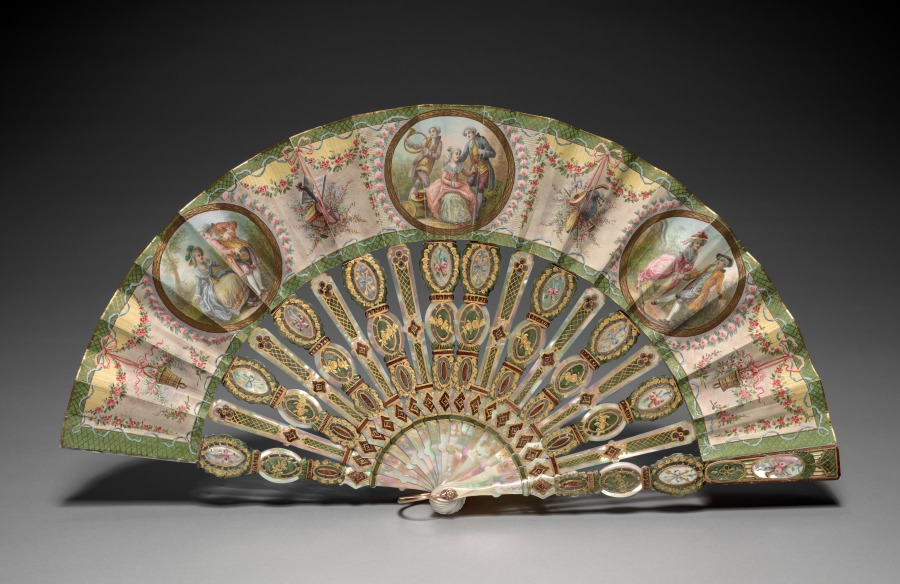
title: Fan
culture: France, late 19th century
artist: Marie Gallois (French)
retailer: Tiffany & Co. (America, New York, est. 1837)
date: c. 1850–1870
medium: Leaf: gouache on paper; sticks and guards: mother-of-pearl; pivot: gold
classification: Miscellaneous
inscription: central medallion signed: "Gallois."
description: This folding fan decorated with figures in 18th-century costume dancing, playing music, and flirting exemplifies the Rococo revival in America. In response to widespread urbanization and the spread of manufacturing, wealthy members of American society embraced styles and subjects of the past such as the fête champêtre (outdoor entertainment). This luxurious, handmade object denounces the mechanization of mass production.